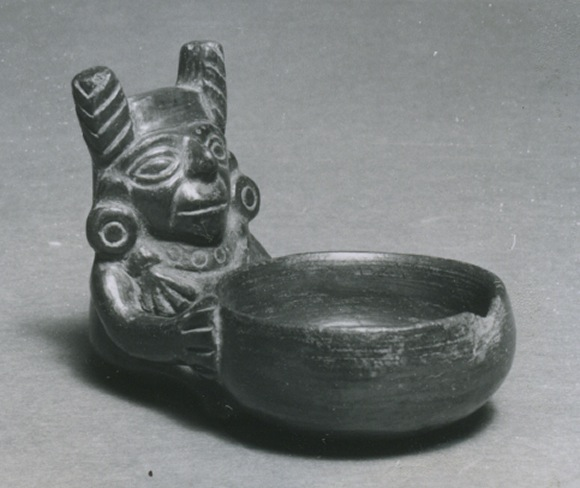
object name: Vessel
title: Cup with a Seated Figure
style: moche, mochica, early intermediate period, Pre-Columbian, americas, andean, andes, Arts of the Americas, south american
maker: Chimú or Moche; North coast, Peru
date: 500–1450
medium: Ceramic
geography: Peruvian North Coast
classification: blackware (black basaltes); earthenware; ceramics; vessel; art of the americas; miniature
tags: people, hairstyles, offering